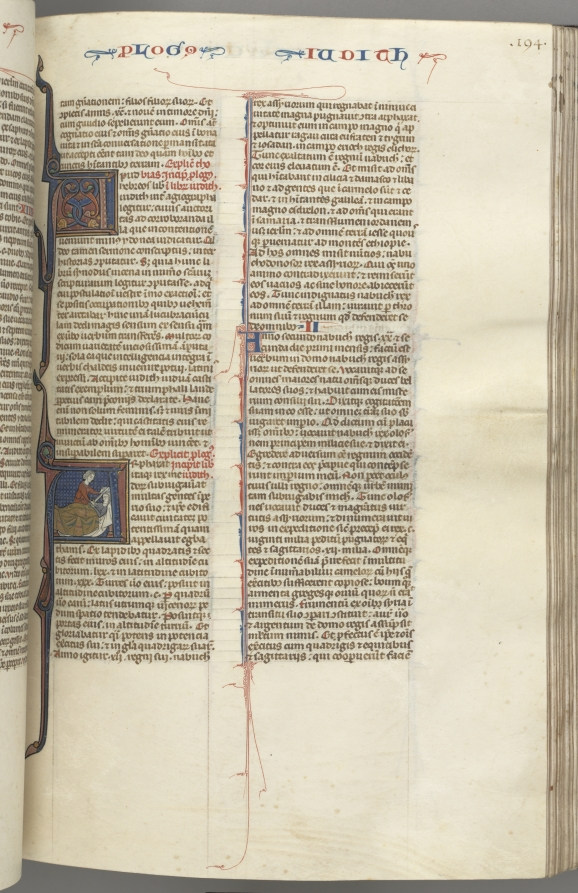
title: Fol. 194r, Judith, historiated initial A, Judith beheading Holofernes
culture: Southern France, Toulouse(?), 13th century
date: c. 1275–1300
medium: ink, tempera and gold on vellum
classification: Bound Volume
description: Biblical manuscripts were highly prized and important possessions of churches, monasteries, cathedral schools, and universities throughout medieval Europe. The biblical texts were known as the vulgate, the translations made by Saint Jerome in the fourth century from Hebrew and Greek into Latin, which became the definitive and official Latin version of the Roman Church. In the 13th century, the bible was, for the first time, produced as a single volume with an officially sanctioned sequence to its books and chapters as illustrated by this example. The very extensive decoration of this bible is arranged hierarchically to indicate the relative importance of the various texts so that full or almost full-page initials mark the openings of the first prologue, Genesis, and the first Gospel; historiated initials mark the beginning of each book and illuminated initials mark the Prologues.